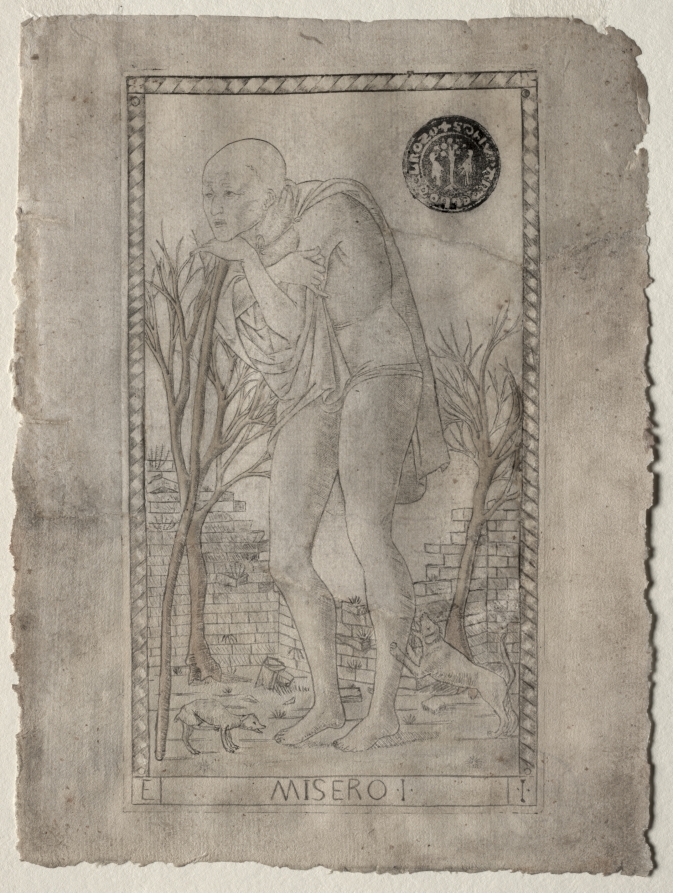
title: The Beggar (from the Tarocchi, series E: Conditions of Man, #1)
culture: Italy, Ferrara, 15th century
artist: Master of the E-Series Tarocchi (Italian, active 1460s)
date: before 1467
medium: engraving hand-colored with gold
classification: Print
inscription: Lettered below the image of Misero (The Beggar): E / MISERO / I / 1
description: This engraving is part of the Tarocchi group marked with the letter “E,” and named Conditions of Man. This series outlines the social and hierarchical order of ten characters (Beggar, Servant, Artisan, Merchant, Gentleman, Knight, Doge, King, Emperor, and Pope), starting from the lowest grade of society and ending with the most important one. Here, Misero (The Beggar) is shown as a full-length male figure, standing in three-quarter profile to the left, and set in an abandoned landscape. Barely covered by a short cloak, the mendicant rests on his staff, whilst two playful dogs keep him company. Aside from the large, disfiguring collector's stamp in the top right corner, the bottom third of this sheet has been lost and replaced. Then someone carefully drew in the lower portion of the figure with pen and ink, copying the image and even including a false platemark.